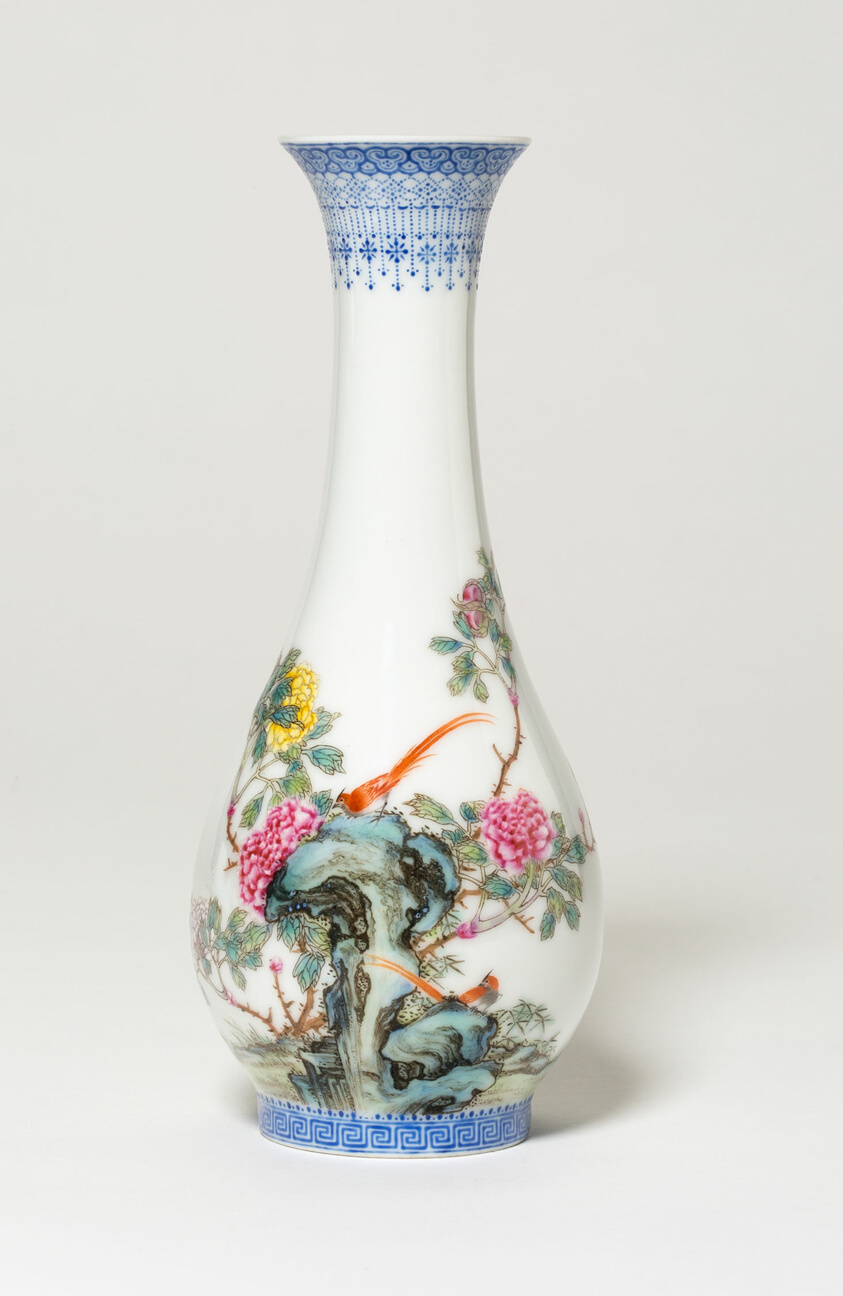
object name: Vessel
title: Famille-Rose Vase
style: Chinese (culture or style)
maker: China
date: Late Qing dynasty or Republican period, first half of 20th century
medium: Porcelain painted in overglaze enamels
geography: China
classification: vase; porcelain; vessel; asian art; ceramics